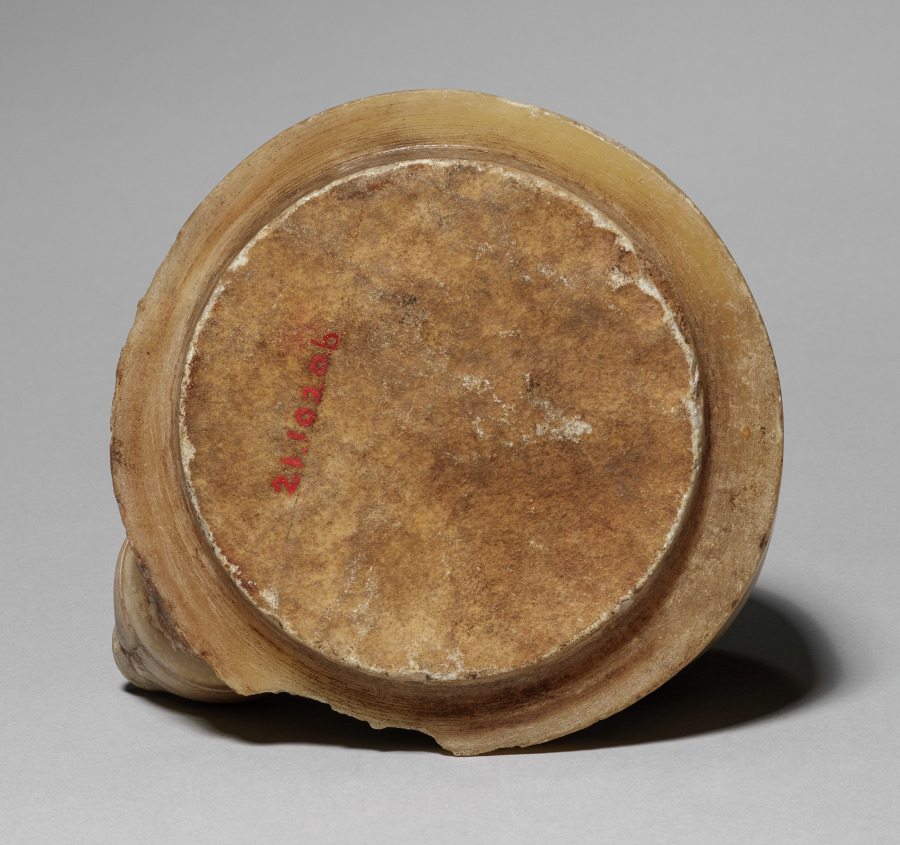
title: Canopic Jar with Baboon's Head (lid)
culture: Egypt, Late period (715–332 BCE), Dynasty 26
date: 664–525 BCE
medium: travertine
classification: Funerary Equipment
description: In the process of mummification, the liver, lungs, stomach, and intestines were removed, separately embalmed, and stored in specialized jars known as canopic jars (after a sailor in Greek mythology, who died at the town of Canopus in the Nile Delta and was worshipped there in the form of a human-headed jar). Each organ was identified with one of four funerary deities collectively known as the Sons of Horus: the liver with Imsety (man's head), the lungs with Hapy (baboon's head), the stomach with Duamutef (jackal's head), and the intestines with Qebehsenuef (falcon's head). It was their duty to protect the deceased and restore to him his body parts in the hereafter.